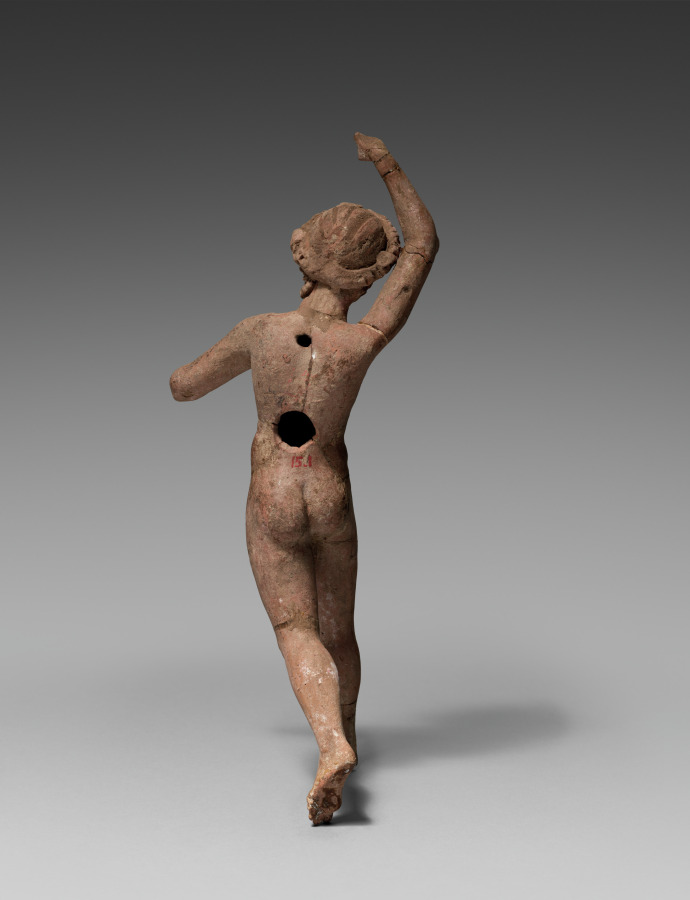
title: Dancing Eros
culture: Anatolia, Myrina, Greece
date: 300–200 BCE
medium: terracotta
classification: Sculpture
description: The region of Myrina in Asia Minor (now part of modern Turkey) is known for its abundance of ancient terracotta figurines. Eros, the Greek god of love, was especially popular. Here he is depicted as a nude youth, not a small child. Eros’ extra-long legs and arms, though only partially preserved, are thrown about in a carefree dance. He wears a celebratory floral crown atop his long curls. Once probably fully painted, only traces of red pigment survive on the face. A figurine like this one may have been a votive or offering of thanks to Eros or Aphrodite, his mother, also a goddess of love, for a successful marriage.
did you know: Figurines of Eros are often paired with figurines of his mythological wife, Psyche.